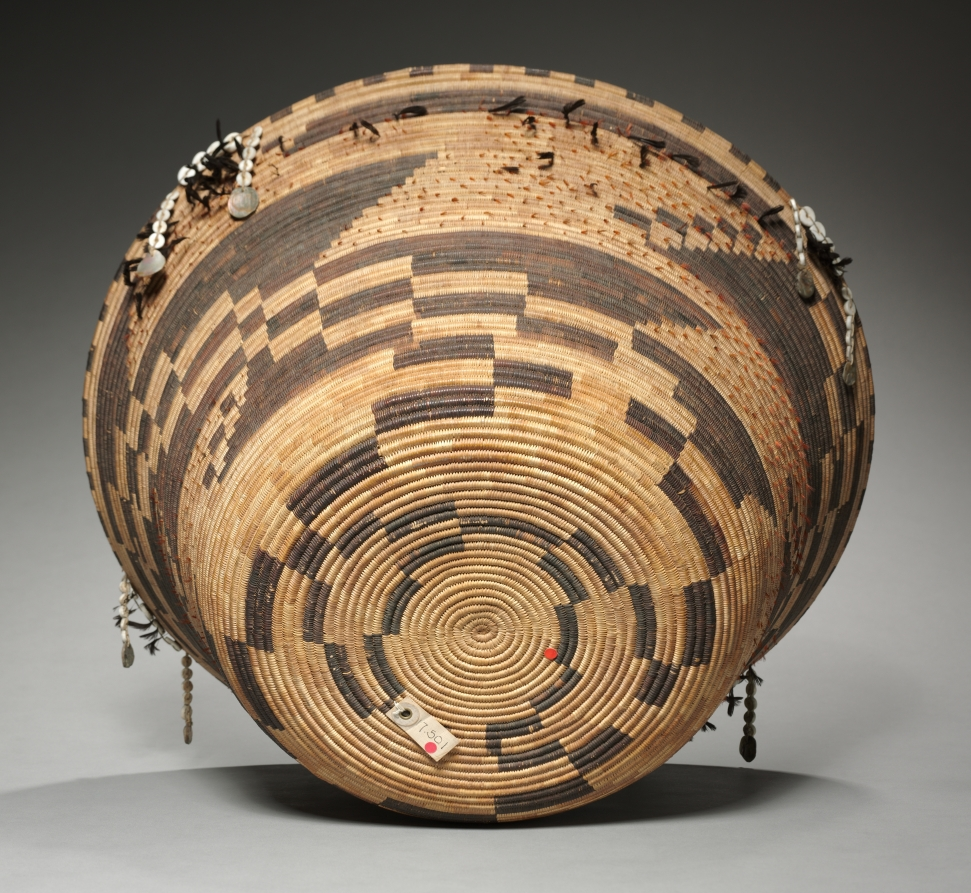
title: Puberty Basket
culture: California, Pomo, late 19th century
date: 1890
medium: coiled, quail and woodpecker feathers, shell, abalone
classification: Basketry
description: This finely woven basin is based on a traditional form that young Pomo women used to wash themselves after ceremonial seclusion following their first menses. The example on display, however, was made for the outside market.